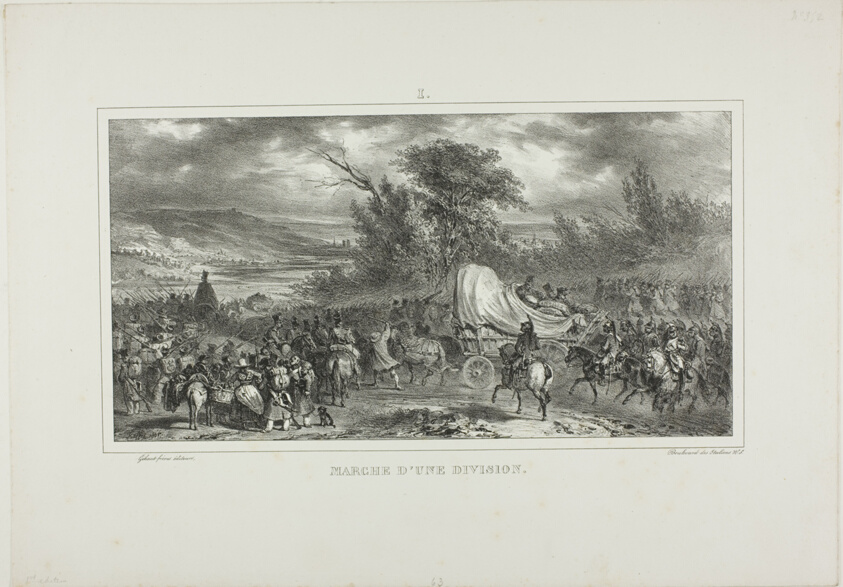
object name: Print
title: Division March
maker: Denis Auguste Marie Raffet (French, 1804-1860); published by Chez Gihaut Frères (French, 19th century)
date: 1831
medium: Lithograph in black on off-white wove paper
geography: France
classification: lithograph; print; prints and drawing